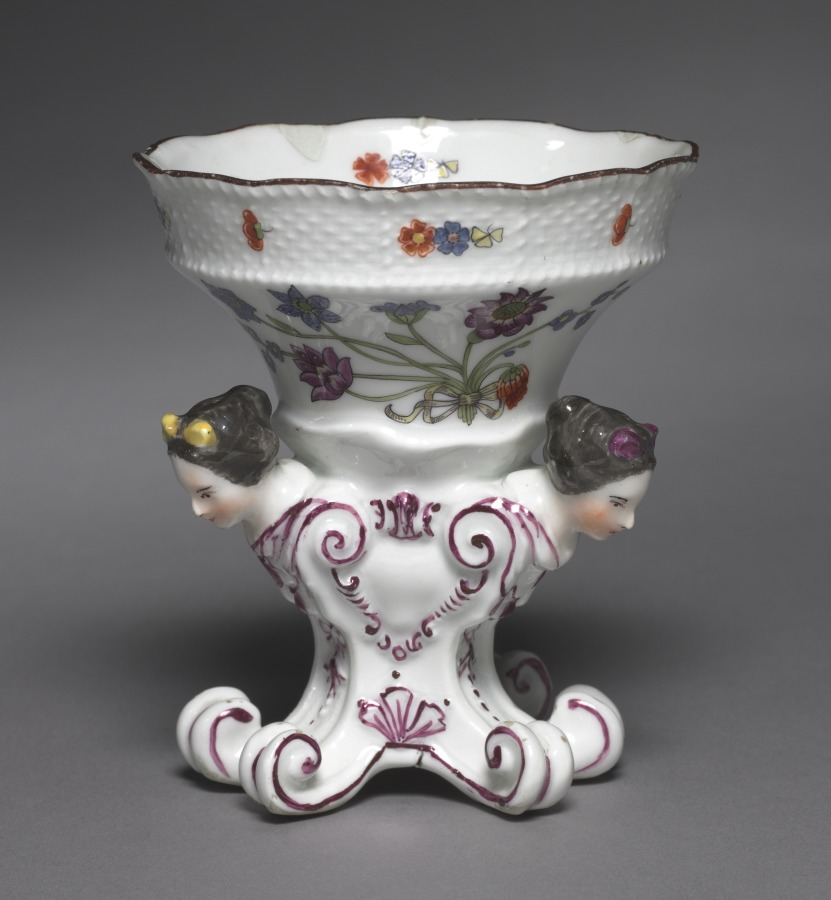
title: Pair of Salt Cellars from the Sulkowsky Service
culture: Germany, Meissen, 18th century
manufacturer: Meissen Porcelain Factory (German, est. c. 1710)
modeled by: Johann Friedrich Eberlein (German, 1696–1749)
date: c. 1736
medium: hard-paste porcelain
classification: Ceramic